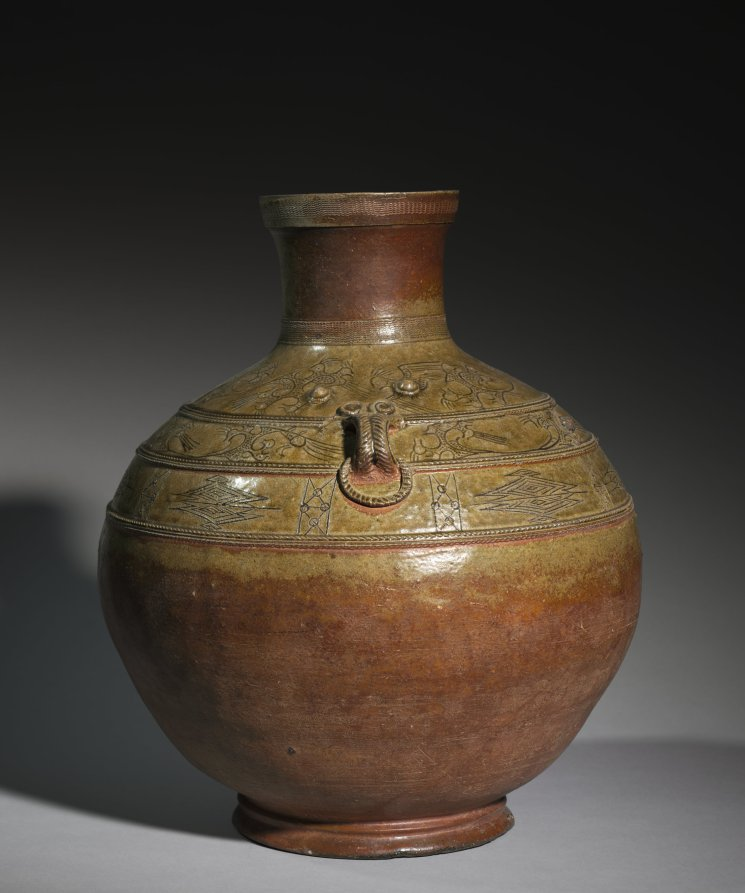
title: Jar (Hu)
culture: China, probably Zhejiang province, Han dynasty (202 BCE–220 CE)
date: 100 BCE–100 CE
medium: glazed stoneware with incised and applied decoration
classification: Ceramic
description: This superb Han dynasty jar has a robust shape imitating that of the bronze (hu) and is covered with a thin brownish-green glaze. The introduction of glazing—which provided an impervious coating to a clay body—marked a technological breakthrough in Chinese ceramic history. High-fired glazed pots were made as early as the Shang and Zhou dynasties (about 1600–256 BC). Potters gained practical technical knowledge of the reaction between the metallic oxide in the glaze and the kiln atmosphere to modify the color of a glaze.